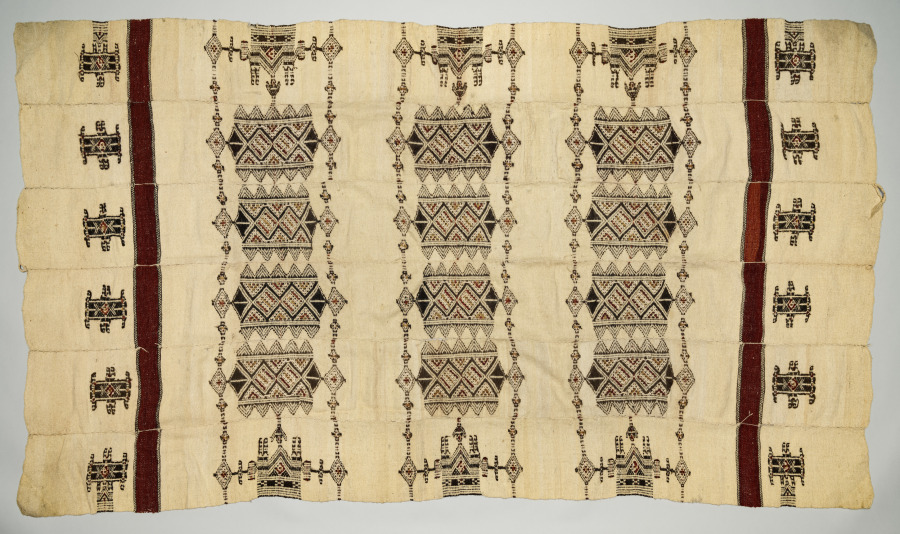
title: Blanket or Cover (Kaasa)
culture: Africa; West Africa; Mali, Niger, or Burkina Faso; Fulani (Peul) style; unknown weavers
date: c. 1930s or earlier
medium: Wool, dye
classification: Textile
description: Made on order, this blanket was hand woven in six strips that were sewn together at the selvages to make the full textile. Repeated named, symbolic geometric motifs in deep browns, blacks, and reds create an overall sense of rhythmic dynamism as naturally dyed colored floated weft (horizontal) threads dance in and out of the undyed cream-colored wool base textile. Some motifs have ties to Islam, as the Fulani were among the first West Africans to convert, or to nearby Tuareg cultures.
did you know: Weavers don’t make sketches to plan the design for this textile but recall it from memory instead.